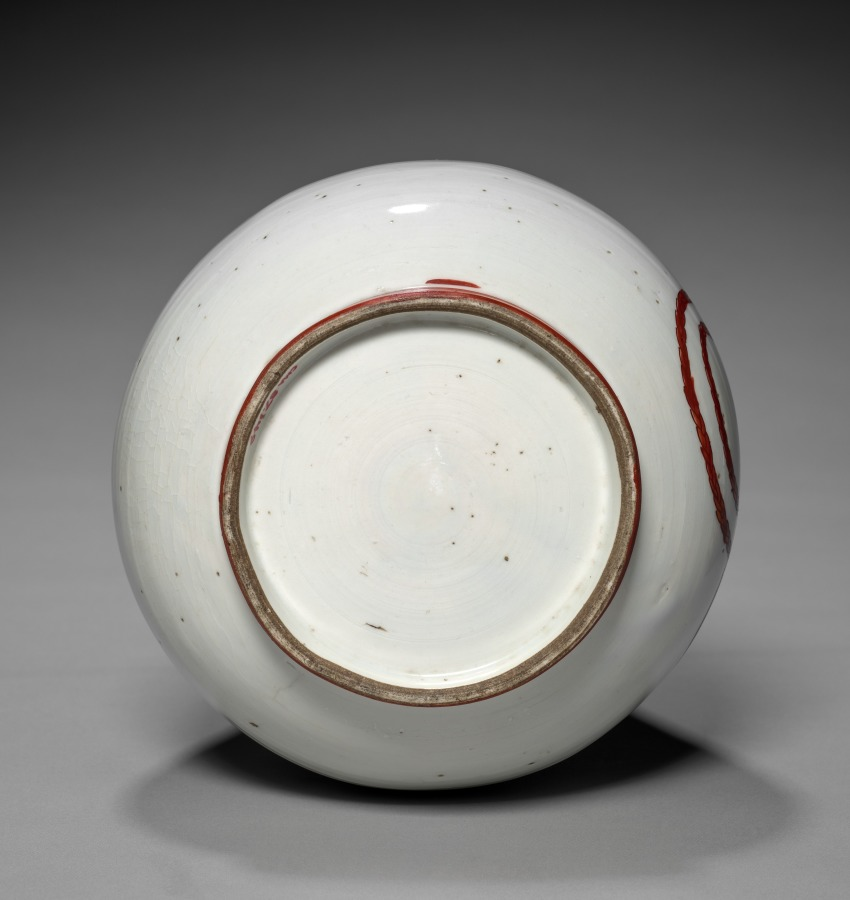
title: Bottle-Flask with Drums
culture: Japan, Edo period (1615–1868)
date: 1700s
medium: porcelain with overglaze color enamel (Hizen ware, Arita type, Imari style)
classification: Ceramic